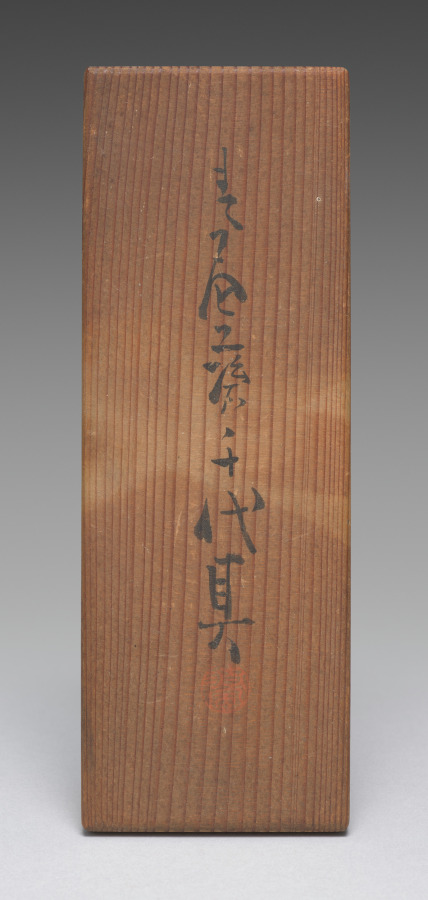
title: Sake Cups with Dragons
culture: Japan, Meiji period (1868–1912)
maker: Seifū Yohei III (Japanese, 1851–1914)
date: 1893–1914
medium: Set of six sake cups; porcelain with underglaze blue and iron oxide rims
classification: Ceramic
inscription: 大日本清風造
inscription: 清風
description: Each of these sake cups pictures two backward-looking dragons. The highly stylized creatures resemble jade carvings.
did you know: Seifū Yohei III was inspired by the Chinese mythical animals that were common on porcelain objects made at Jingdezhen in China during the Ming dynasty (1368–1644) and then exported around the world.